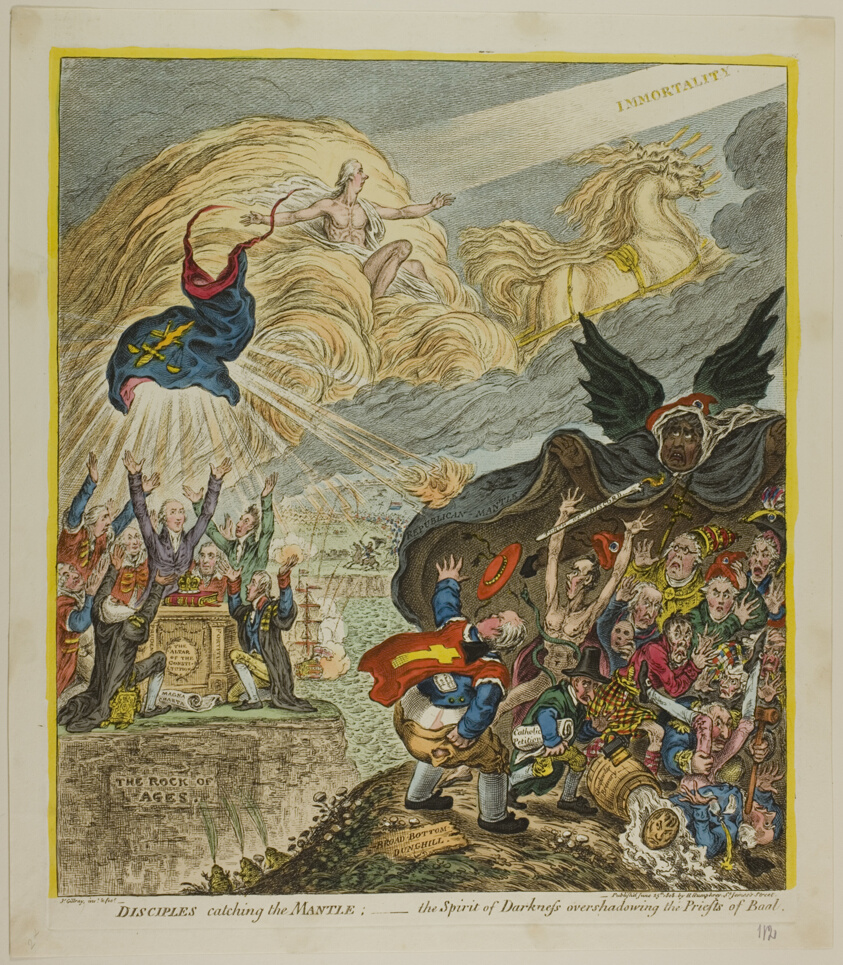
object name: Print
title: Disciples Catching the Mantle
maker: James Gillray (English, 1756-1815); published by Hannah Humphrey (English, c. 1745-1818)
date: published June 25, 1808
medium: Hand-colored etching on paper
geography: England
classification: etching; print; prints and drawing